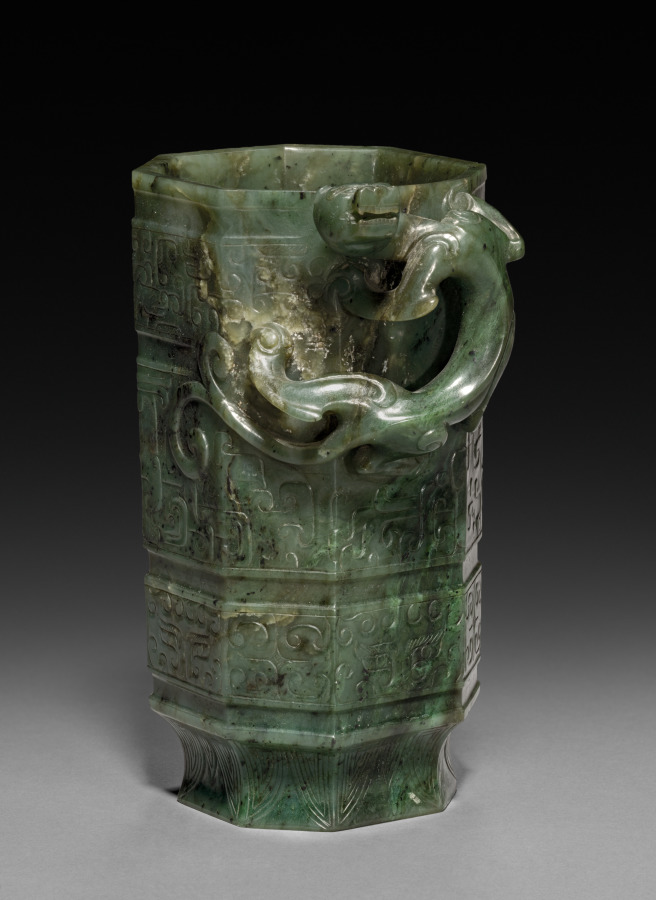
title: Octagonal Ewer with Dragon Handle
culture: China, Qing dynasty (1644–1911), Qianlong reign (1736–95)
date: 1736–95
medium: jade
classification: Jade